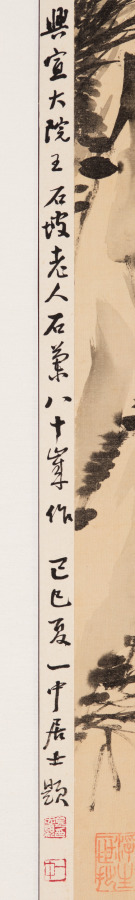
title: Orchids and Rocks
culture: Korea, Joseon dynasty (1392–1910)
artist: Yi Ha-eung (Korean, 1820–1898)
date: 1897–98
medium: Eight-panel folding screen; ink on silk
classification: Painting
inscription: Translation: [I] painted for the high minister Yangwon. [I] humbly request your corrections and advice [on my painting]. [By] an eighty-year old gentleman of rocks.)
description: Yi Ha-eung (1820−1898), the artist of this eight-panel folding screen, was one of the most influential men in late 19th-century Korea. Acting as the regent for his son, King Gojong (1852−1919), who ascended the throne at the age of thirteen, Yi ruled Korea from 1866 to 1873. In addition to his illustrious political career, Yi was also recognized as one of the most celebrated artists who led the revival of literati art in late 19th-century Korean art. In particular, he was recognized as the master of orchids, one of the “Four Gentlemen” (plum, orchid, chrysanthemum, and bamboo) themes. Solely relying on monochrome ink, Yi depicted the curvilinear silhouettes of cymbidium orchid leaves dramatically hanging down from cliffs. Growing in wilderness and redolent with fragrance, orchids were often associated with the perseverance of principled gentlemen, and thus became one of the most popular subjects of scholar-artists' paintings.On the upper right corner of the far left panel, Yi wrote a short inscription stating that he painted the work at the age of 80.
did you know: The artist of this elegant painting is the formidable politician Yi Ha-eung (1820–1898), who is known for a seclusion policy that aimed to protect Korea and its sovereignty from foreign influences.